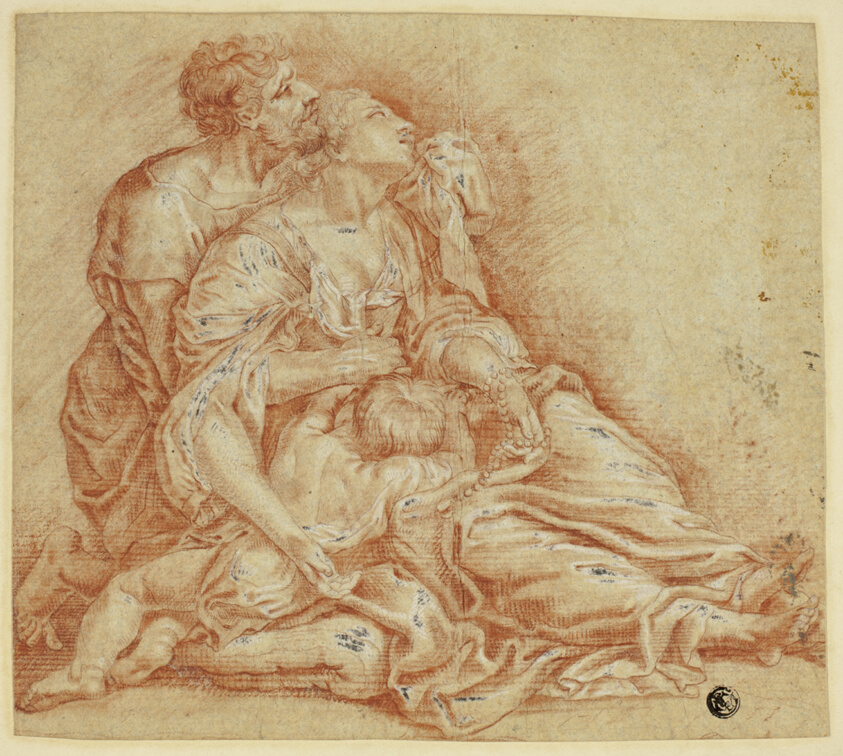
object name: Drawing and Watercolor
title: Family Group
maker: Unknown Artist; European, n.d.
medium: Red chalk, with stumping, heightened with lead white (discolored), on blue laid paper, tipped on cream wove paper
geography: France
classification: chalk; drawings (visual works); prints and drawing